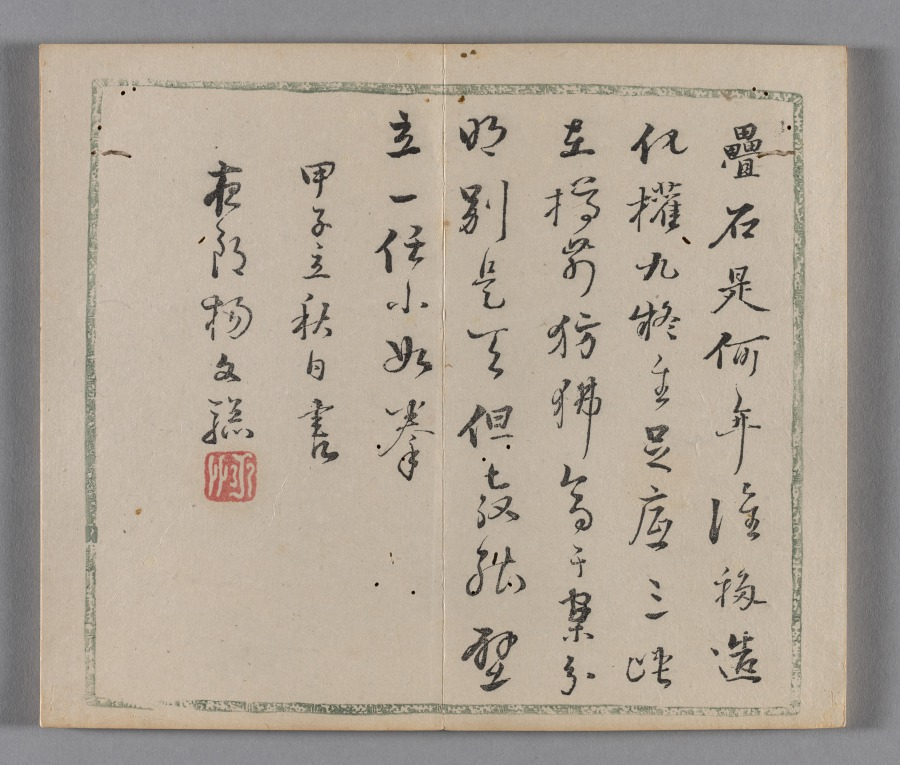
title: Ten Bamboo Studio Painting and Calligraphy Handbook (Shizhuzhai shuhua pu): Round Fans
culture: China, Qing dynasty (1644-1911)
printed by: Hu Zhengyan (Chinese, c. 1584–1674)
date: 1633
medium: Woodblock-printed book; ink and colors on paper; first edition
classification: Print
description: Color printing reached a level of perfection in the early 1600s, as seen in this Ten Bamboo Studio Collection of Calligraphy and Painting and the Mustard Seed Garden Manual of Painting (printed 1679 and 1701). The painterly quality, precision in registering (aligning) the woodblocks, and harmonious colors made them the most successful color print editions in Chinese history. Both editions were printed and compiled in Nanjing, spread nationwide, and had a great impact on the arts in Japan and Korea.